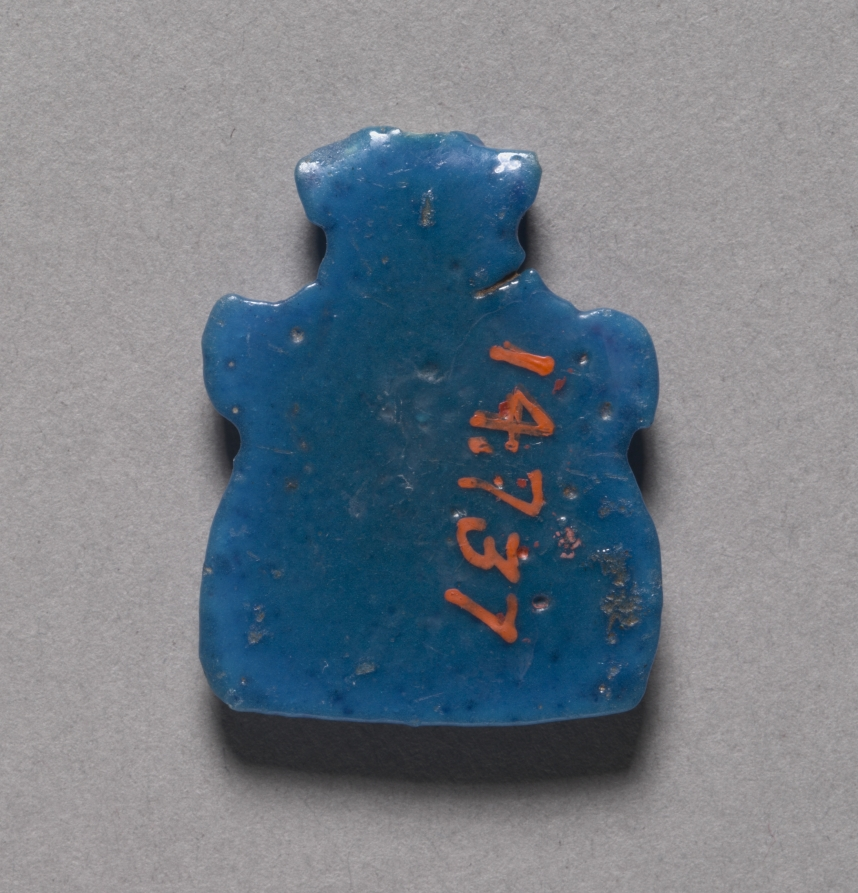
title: Bes Head Amulet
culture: Egypt, Third Intermediate (1069–715 BCE) or later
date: 1069–715 BCE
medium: turquoise blue faience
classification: Amulets